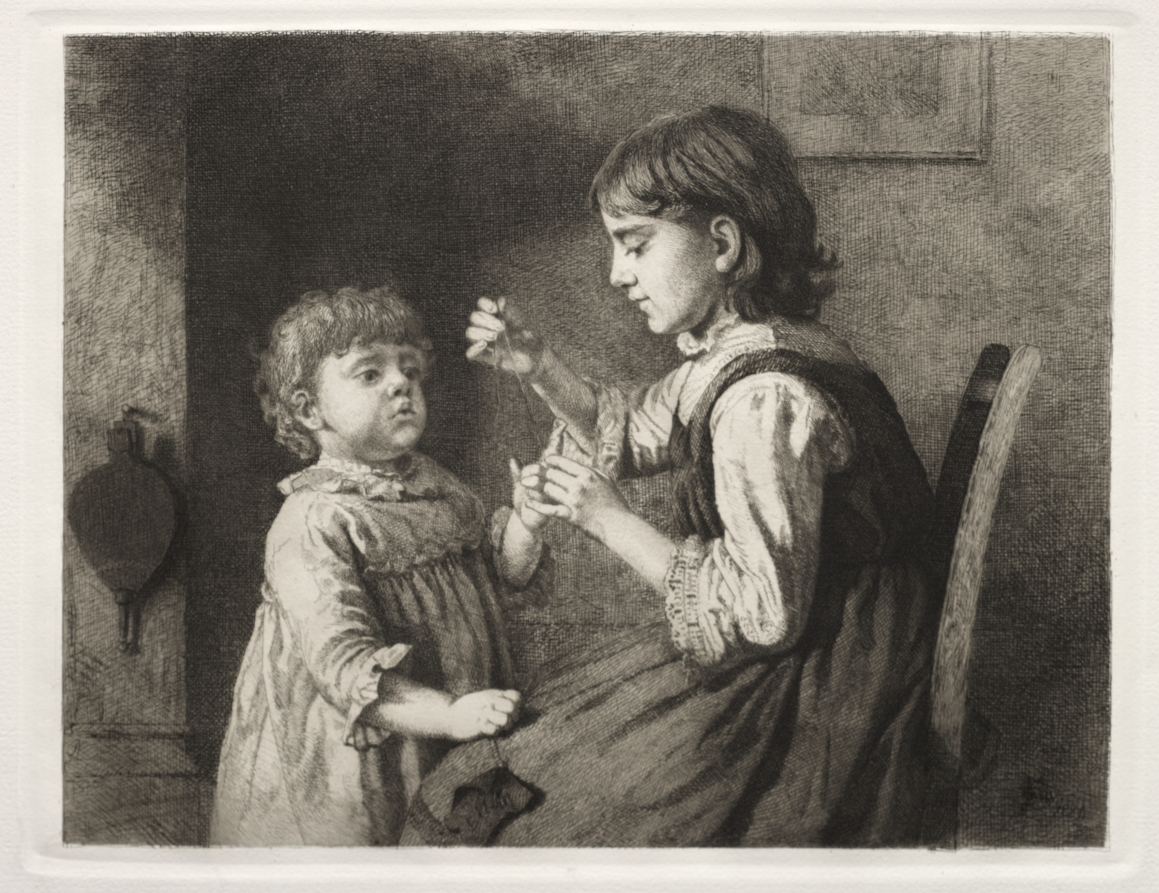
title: The First Needlework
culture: America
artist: Seymour Joseph Guy (American, 1824–1910)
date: 1884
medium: etching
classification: Print